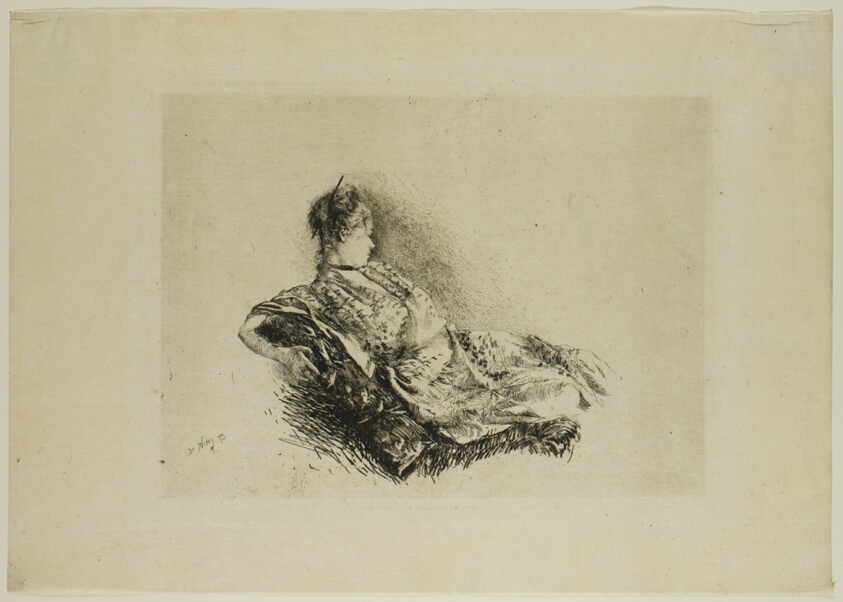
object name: Print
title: The Dancer Holoke-Go-Zen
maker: Giuseppe De Nittis (Italian, 1846-1884)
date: 1873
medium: Etching, drypoint, and roulette in black on cream Japanese paper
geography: Italy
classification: etching; paper; print; prints and drawing